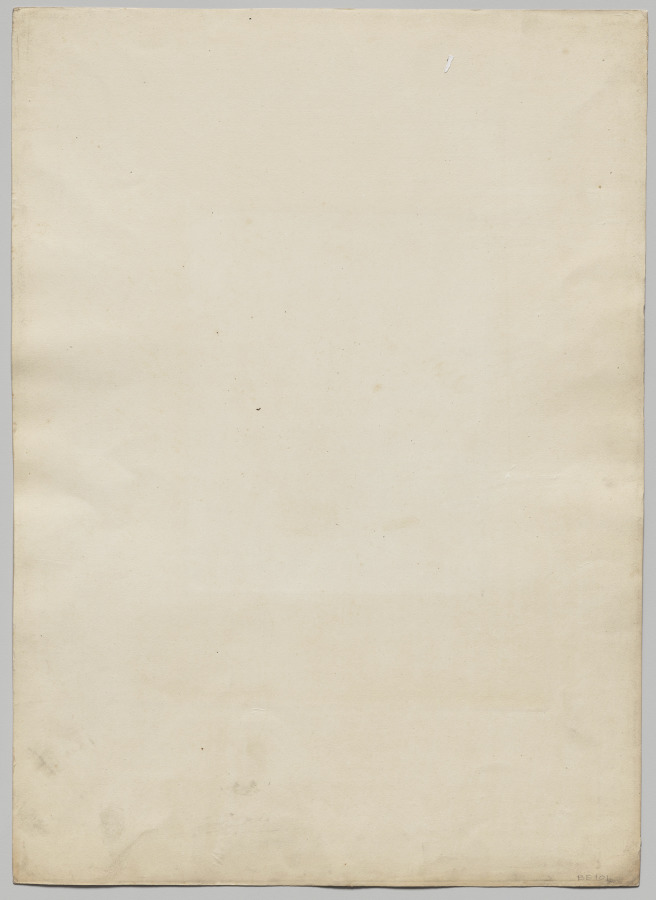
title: Gorge de la Nouvelle Route des Eaux-Chaudes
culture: England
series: Souvenirs des Pyrenées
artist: John Stewart (British, 1800–1887)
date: c. 1851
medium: salt print from a waxed paper negative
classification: Photograph